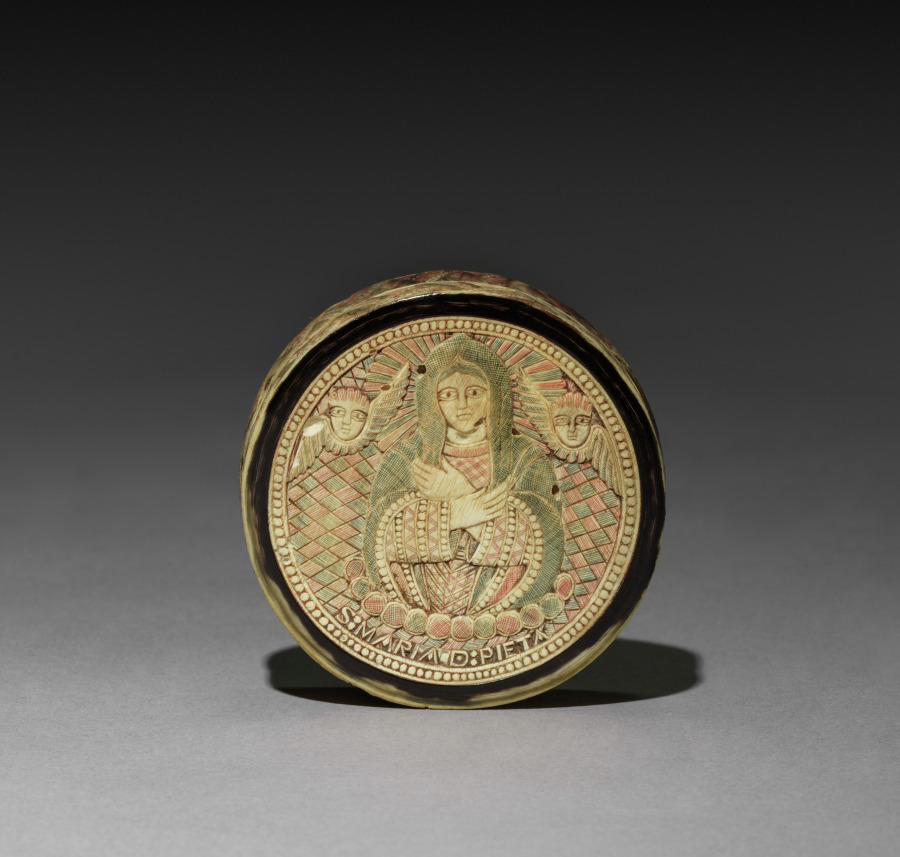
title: Box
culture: Spain (colonial ?), 19th century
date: 1800s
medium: bone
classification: Miscellaneous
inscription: on cover: "S:MARI:/ ADDOL:"; on back: "S:MARIAD:PIETA."